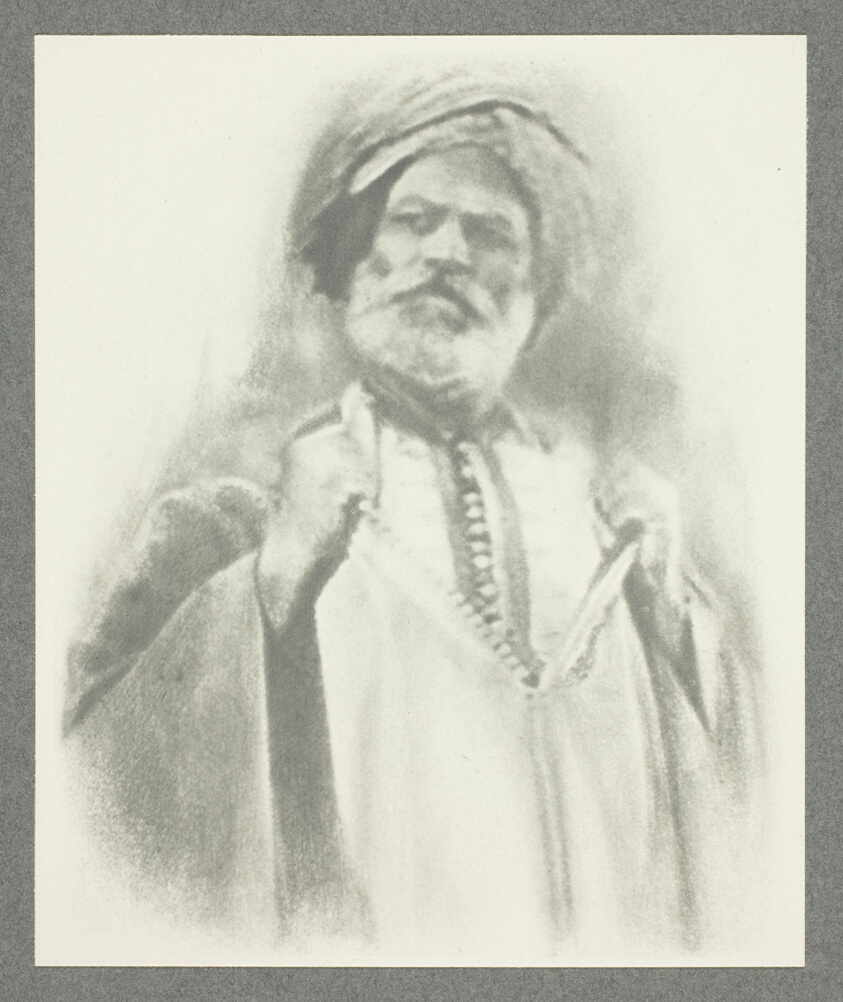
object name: Photograph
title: A Sketch, No. 7 from the portfolio "American Pictorial Photography, Series I" (1899)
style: Pictorialism, 19th century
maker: Joseph T. Keiley (American, 1869–1914)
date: c. 1897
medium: Photogravure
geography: United States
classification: photogravure; photomechanical process; photography; photograph